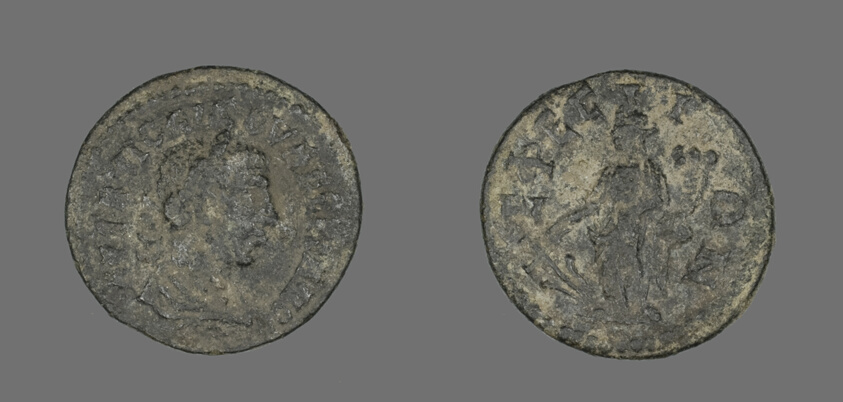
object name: Coin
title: Coin Portraying Emperor Valerian I ?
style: roman (ancient, style or period), ancient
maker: Roman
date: 253-260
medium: Bronze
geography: Roman Empire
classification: coin; ancient art